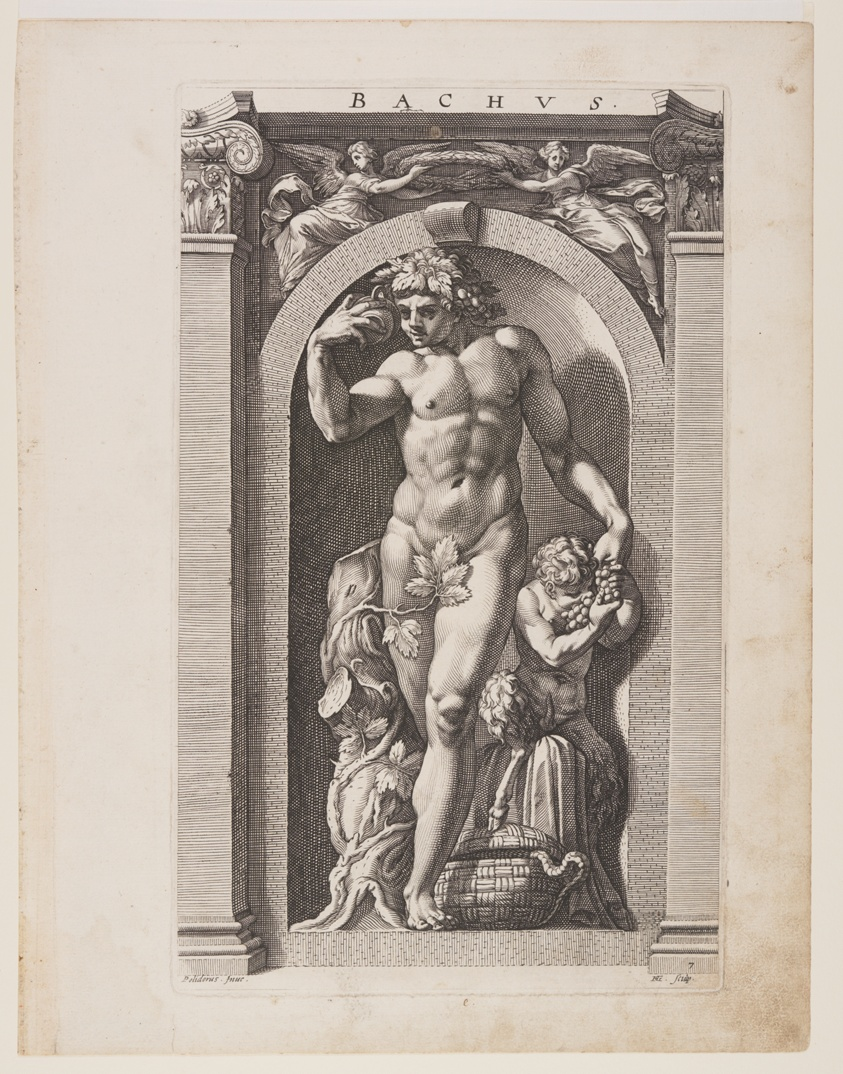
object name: Print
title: Bacchus, from Eight Pagan Gods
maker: Hendrick Goltzius (Dutch, 1558–1617); after Polidoro da Caravaggio (Italian, c. 1499–c. 1543)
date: 1592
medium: Engraving on ivory laid paper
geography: Netherlands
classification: print; paper; prints and drawing; engraving